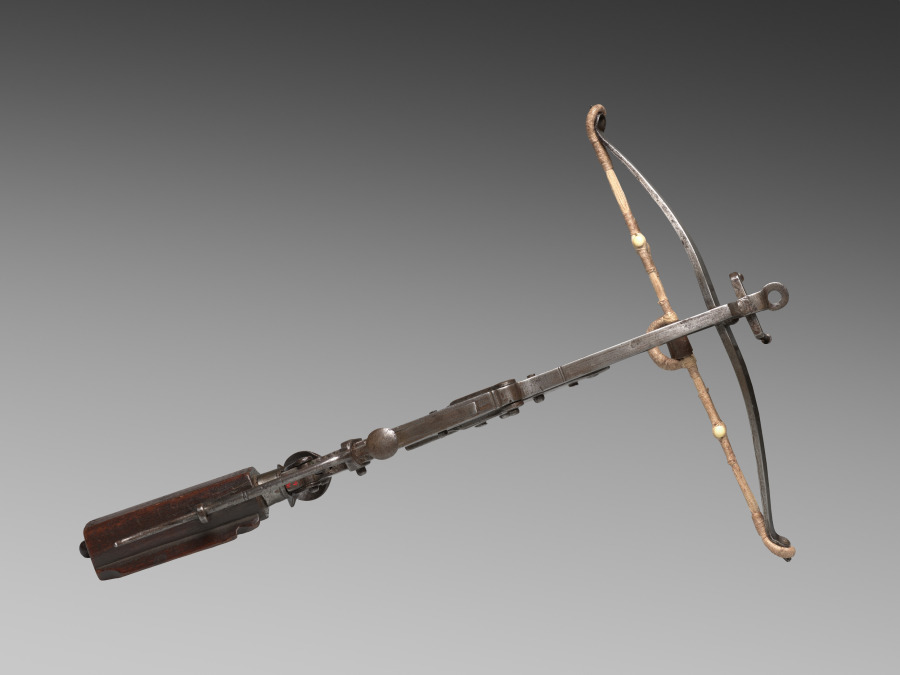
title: Pellet Crossbow for a Child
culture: Germany, early 17th Century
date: c. 1600–1650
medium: wood, bone inlay, steel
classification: Arms and Armor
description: This crossbow, made for the use of a small child, was designed to throw small stones or pellets. The bow string is an accurate replacement.